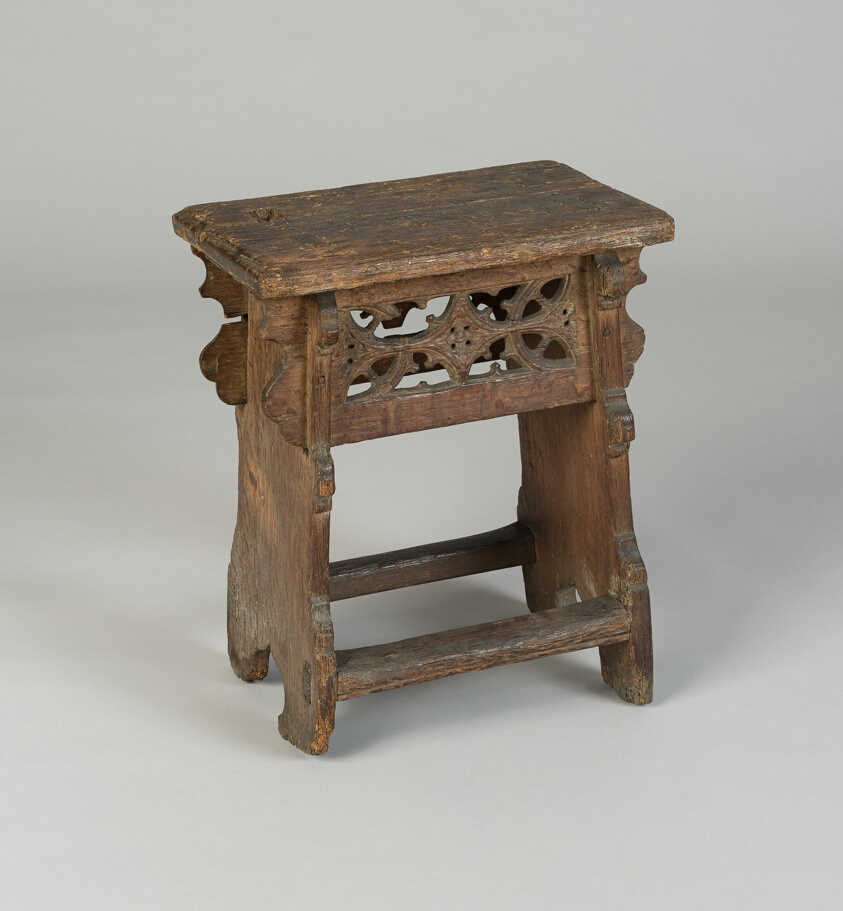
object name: Decorative Arts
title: Stool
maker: North European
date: 15th century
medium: Oak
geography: Europe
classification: seating; furniture; european decorative arts; decorative arts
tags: furniture